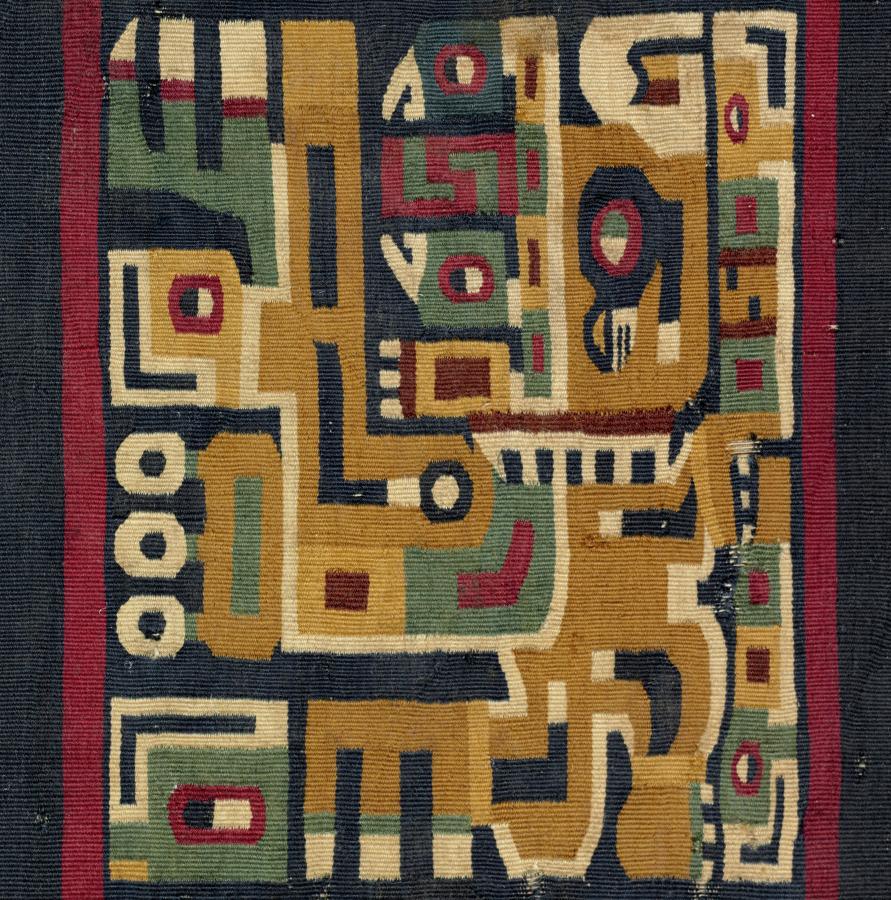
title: Half of a Sleeved Tunic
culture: Central Andes, Middle Horizon, Wari, 6th-11th century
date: c. 500–1000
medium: single-interlocked tapestry; cotton warp; camelid fiber weft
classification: Textile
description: The bird-headed creature in profile that repeats in each of this tunic's design fields gazes upward, holds a staff of authority in front of its body, and wears an ornate headdress behind which a three-feathered wing can be seen. The extremely high technical quality of such tunics suggests that the Wari reserved bird imagery for their most exalted rulers. Here, the original incorporated more than twice as much yarn as the routine--some 19 miles, all handmade and much dyed an inky, dark blue, the most prestigious of Wari colors.